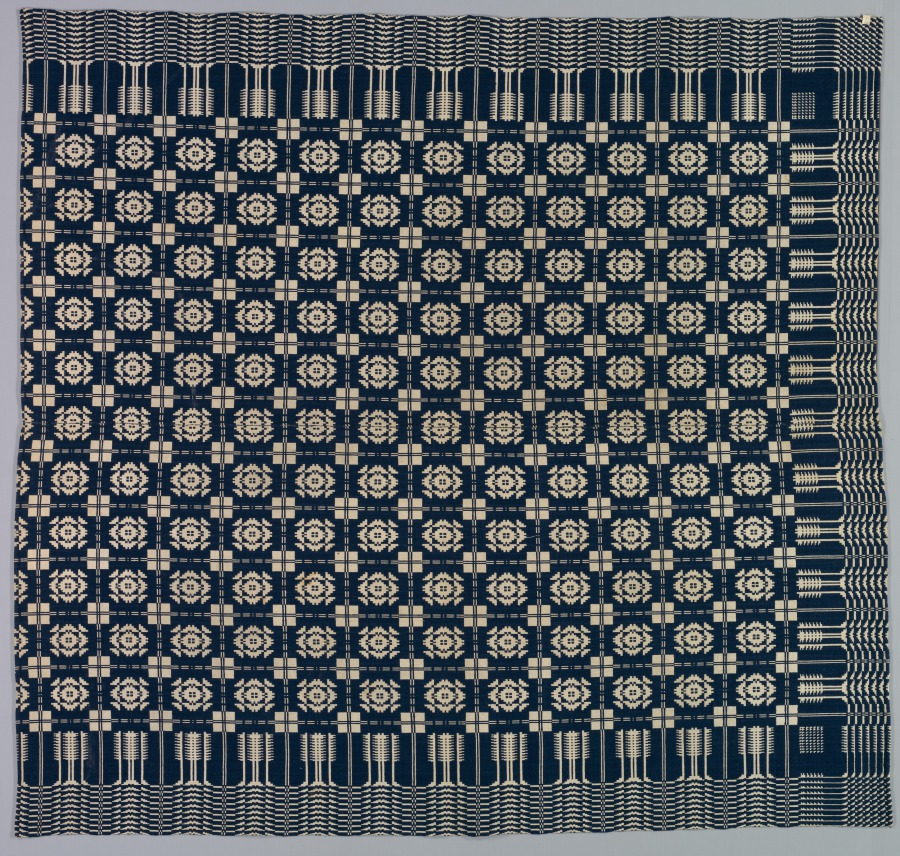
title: Coverlet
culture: America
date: 1825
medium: double weave: wool and cotton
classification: Textile